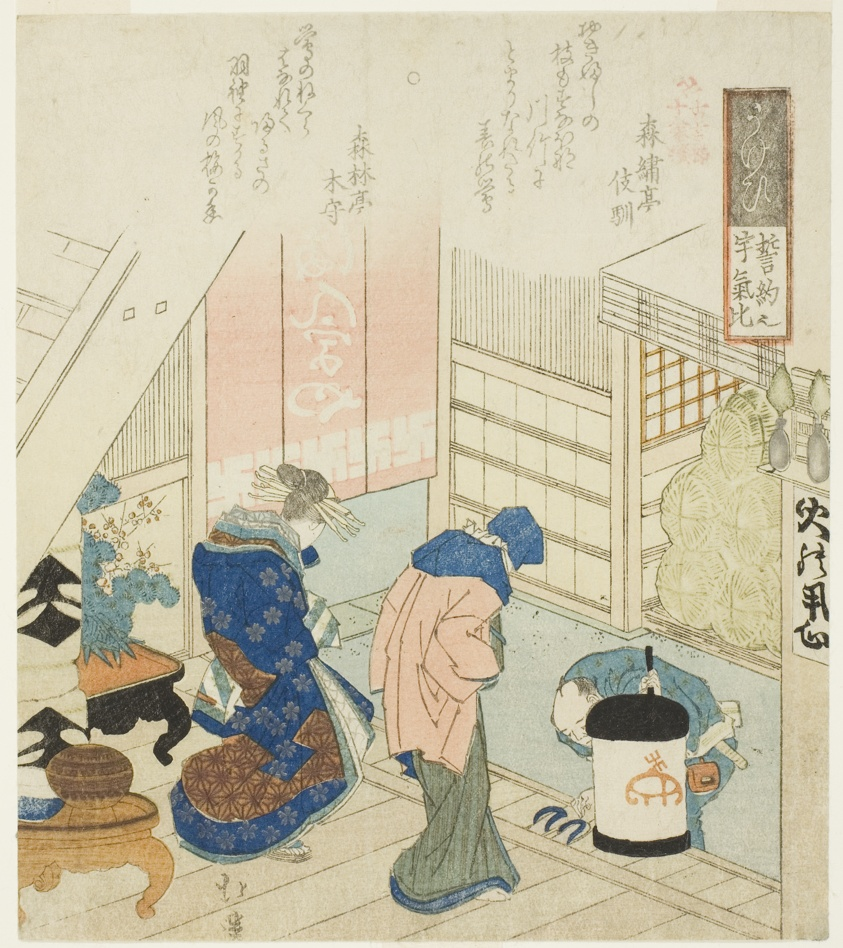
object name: Print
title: Promise (Seiyaku no ukei), from the series "Eighteen Illustrations of the Ladder of Ancient Words (Kogentei juhachiban tsuzuki)"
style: Japanese (culture or style)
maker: Totoya Hokkei (Japanese, 1780-1850)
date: 1831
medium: Color woodblock print; shikishiban, surimono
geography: Japan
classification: woodblock print; print; asian art